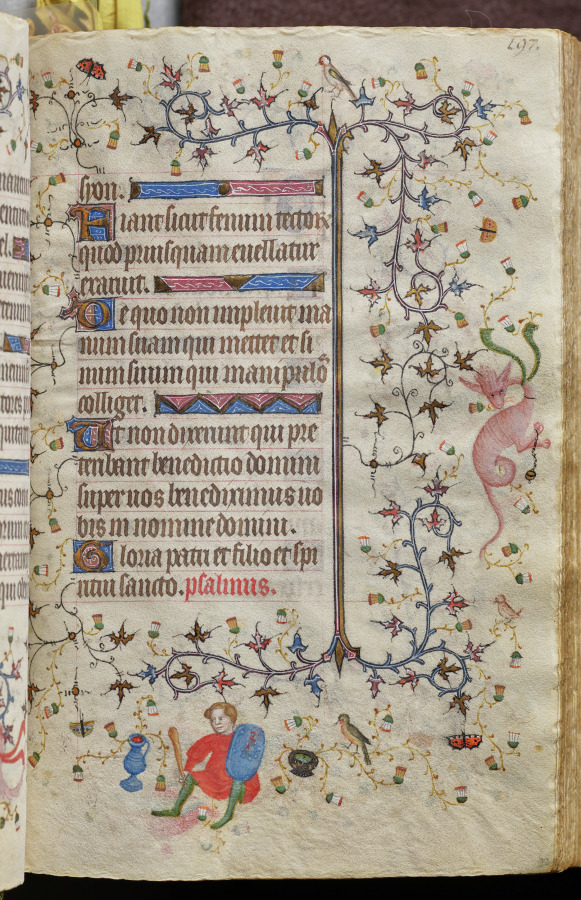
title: Hours of Charles the Noble, King of Navarre (1361-1425): fol. 98r, Text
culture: France, Paris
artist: Master of the Brussels Initials and Associates (French)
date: c. 1405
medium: ink, tempera, and gold on vellum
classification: Bound Volume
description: This precious volume was obviously highly prized by its owner, the French-born King of Navarre, who had his coat of arms painted on no less than twenty folios. Rather than directly commissioning this manuscript from a specific workshop, it seems that Charles the Noble acquired his book of hours -- perhaps ready-made for the luxury market -- while on a trip to Paris in 1404-05. A collaborative effort, six painting styles are evidenced within the pages of this codex, those of two Italians, two Frenchmen, and two Netherlanders. The painter who was responsible for the planning and decoration of the book, and who produced seventeen of the large miniatures, was a Bolognese artist known as the Master of the Brussels Initials. His principal assistant, responsible for most of the borders, was a Florentine who signed his name "Zecho" da Firenze on folio 208 verso.